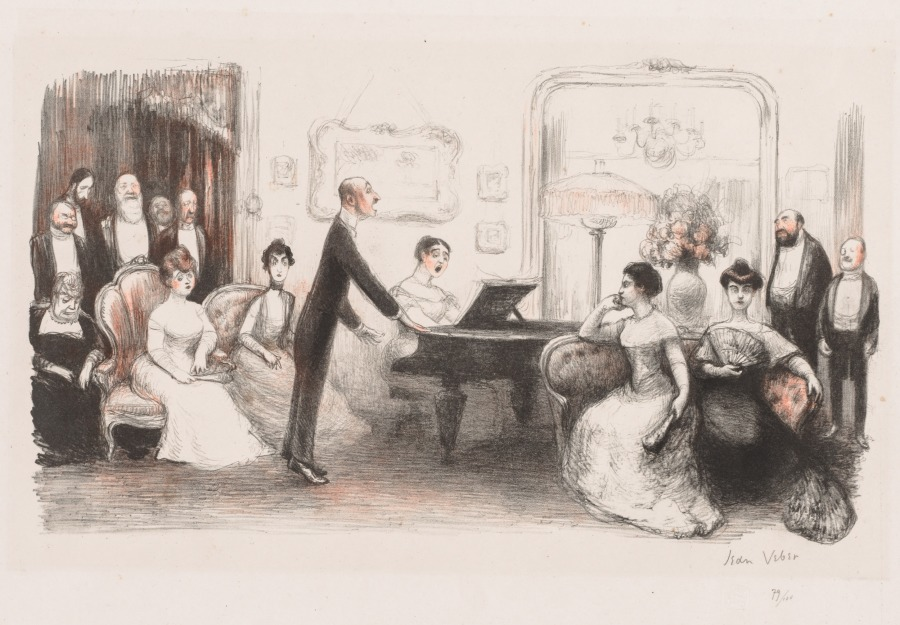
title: La Soirée Bourgeoise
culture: France, 19th century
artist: Jean Veber (French, 1864–1928)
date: 1907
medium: color lithograph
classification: Print